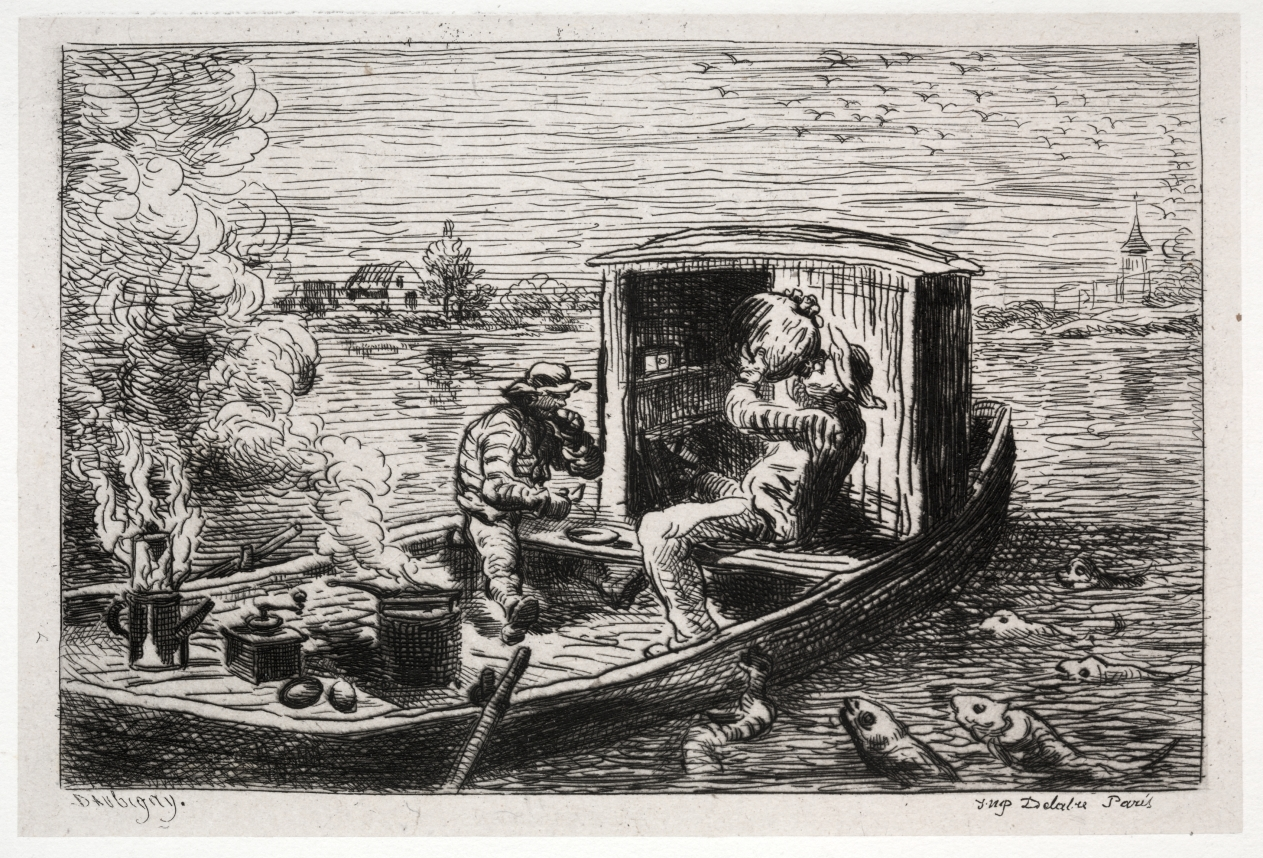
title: The Boat Trip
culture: France, 19th century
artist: Charles François Daubigny (French, 1817–1878)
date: 1861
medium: 16 etchings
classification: Portfolio